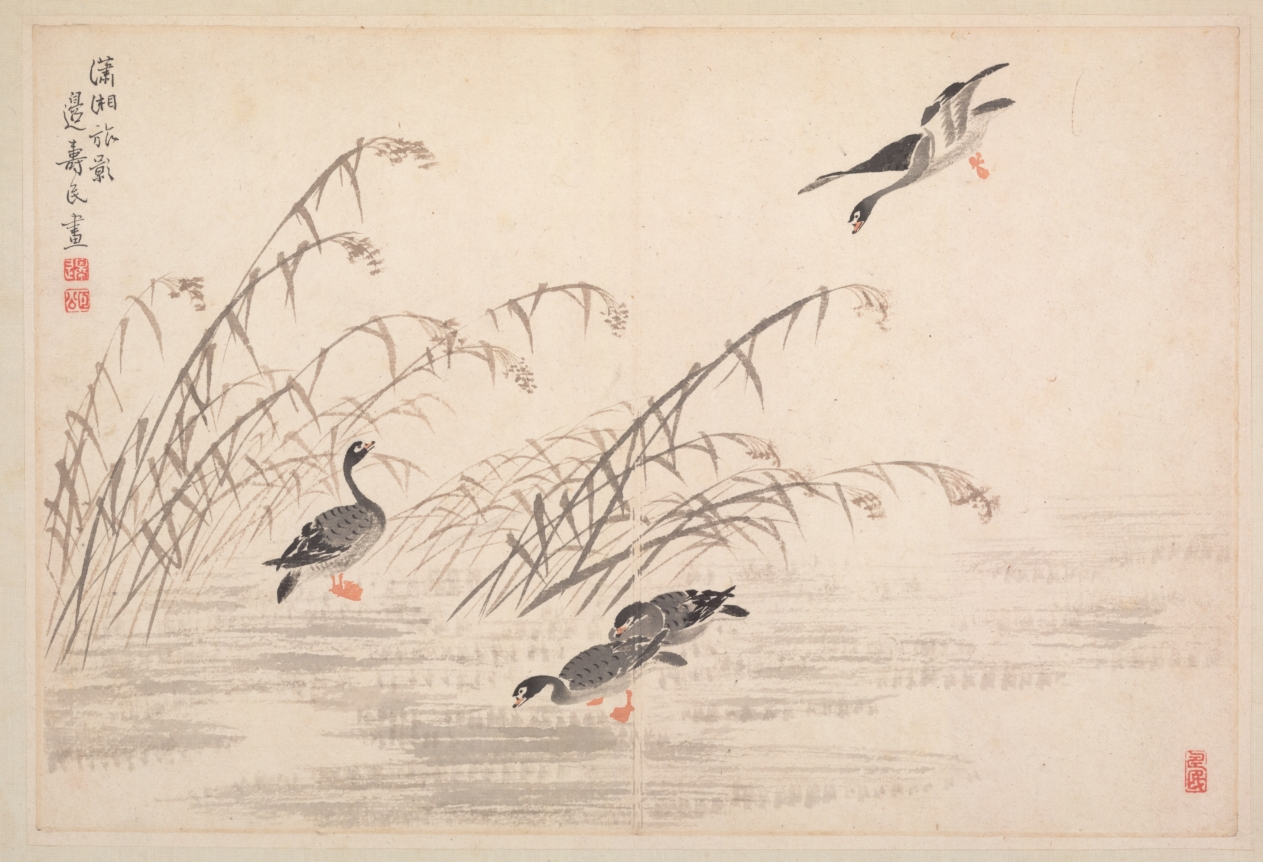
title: Album of Calligraphy and Paintings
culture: China, Qing dynasty (1644-1911)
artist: Bian Shoumin (Chinese, 1684–1752)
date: first half of the 1700s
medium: album leaf; ink and color on paper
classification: Painting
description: The artist Bian Shoumin is known for his depiction of wild geese, water, and reeds. The migrant birds in autumn and winter evoked, in the minds of the Chinese intelligentsia, a time of parting and sorrow.